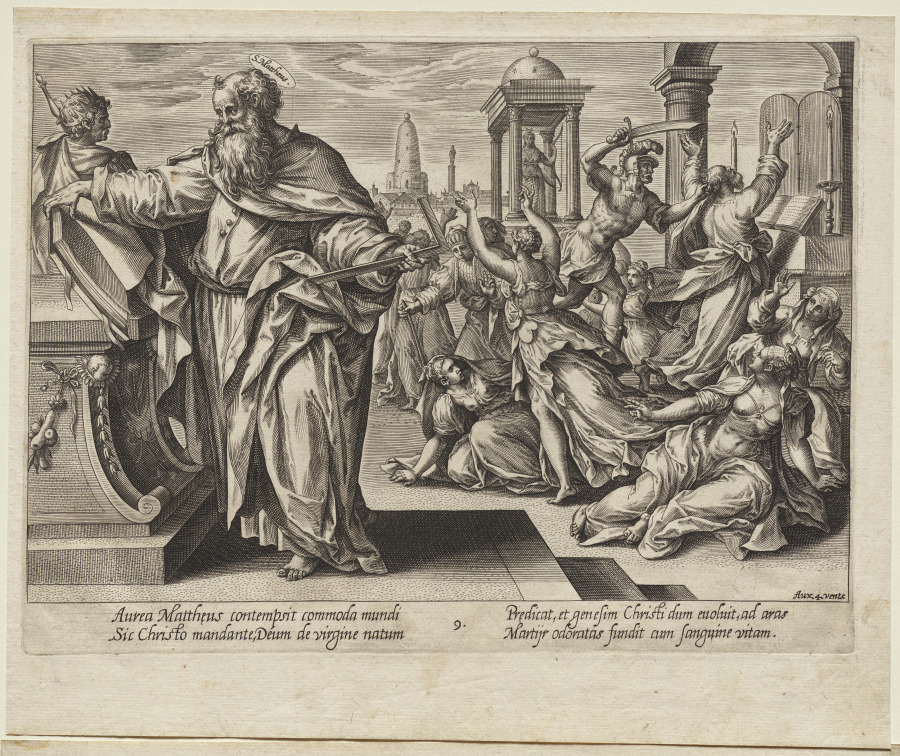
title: St. Matthew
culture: Netherlands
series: Christ, St. Paul, and the Twelve Apostles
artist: Hendrick Goltzius (Dutch, 1558–1617)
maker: after Maarten de Vos (Flemish, 1532–1603)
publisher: Aux Quatre Vents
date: c. 1578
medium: engraving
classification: Print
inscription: Aux.4.vents. bottom right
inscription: Verses in lower margin: Aurea Mattheus…sanguine vitam. In nimbus: S. Mattheus. Numbered 9.